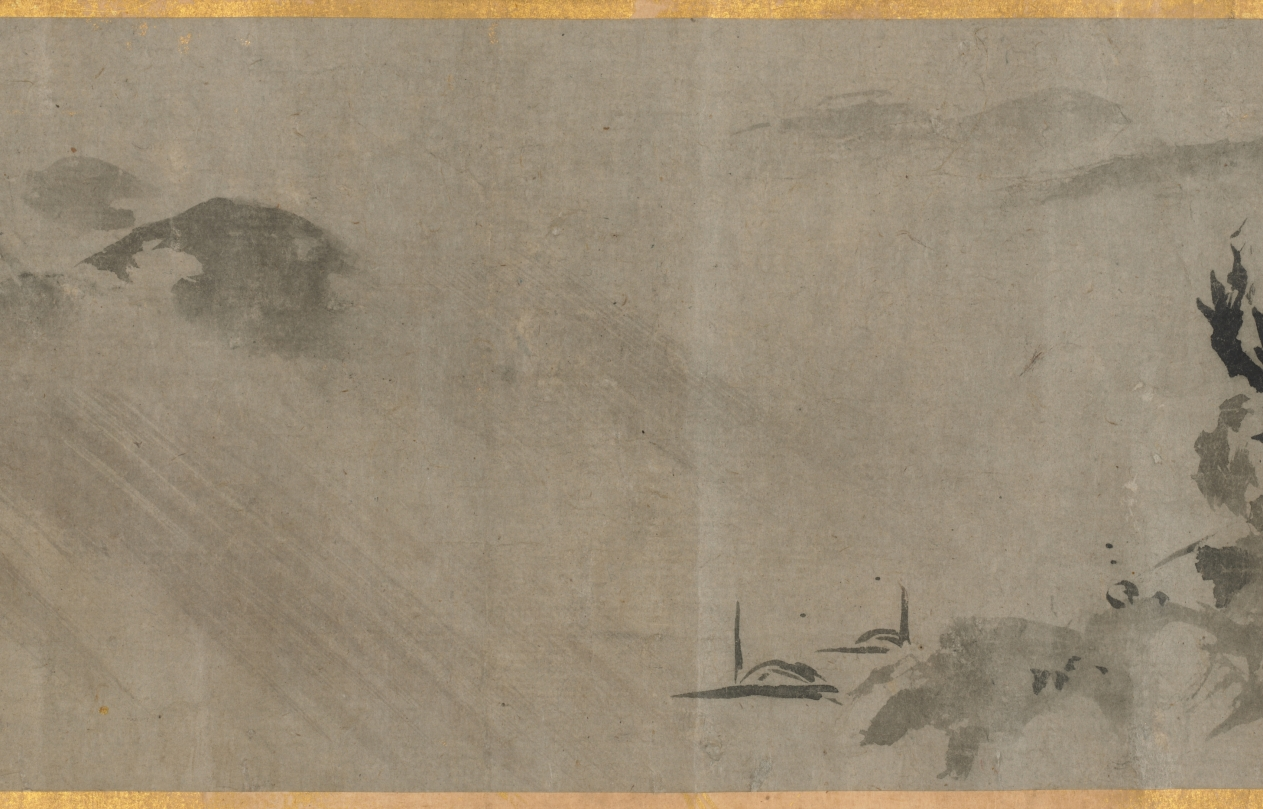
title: Eight Views of Xiao-Xiang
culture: Japan, Muromachi period (1392–1573)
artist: Sesson Shūkei (Japanese, c. 1492–c. 1577)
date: 1500s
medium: handscroll; ink on paper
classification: Painting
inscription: Signature and seal of artist at end of painting.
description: Eight Views of the Xiao and Xiang Rivers can be traced to 11th-century Chinese poems and paintings, the depiction of which had also become popular among Korean and Japanese painters. Xiao-Xiang refers to the region in present-day Hunan province where the Xiao and Xiang rivers converge. Few painters of the Eight Views had in fact seen the scenery; rather, they were trying to portray in ink and wash the lyrical qualities of dim light and a misty atmosphere typical of that region. Each of the poetic titles suggests a time of day, a season, or specific atmospheric conditions—subjects that challenged the abilities of the most talented artists. In this miniature painting (shukuzu) of the Muromachi period, Japanese Zen monk and painter Shukei Sesson depicted all eight views featured in Chinese prototypes: Wild Geese Descending to Sandbar; Returning Sails Off a Distant Coast; Mountain Market in Clearing Mist; River and Sky in Evening Snow; Autumn Moon over Dongting Lake; Night Rain on the Xiao and Xiang; Evening Bell from Mist-Shrouded Temple; and Fishing Village in Evening Glow.